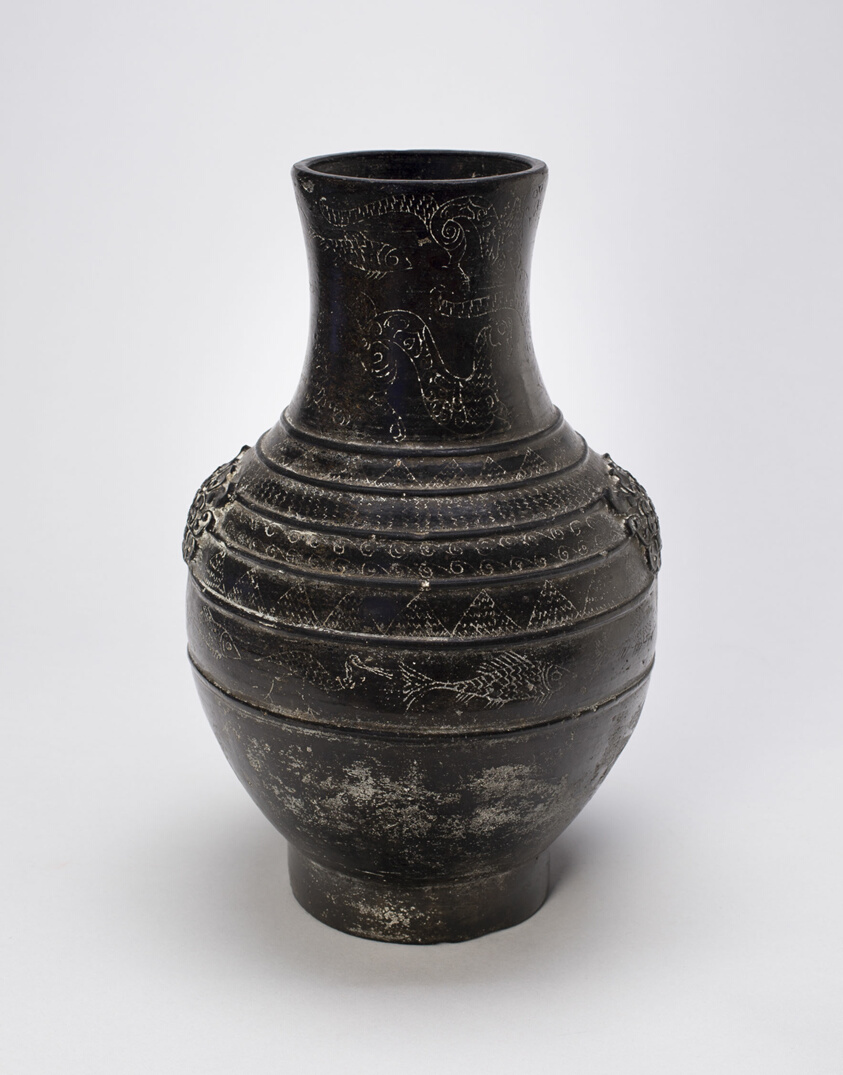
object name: Vessel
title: Container in the Form of a Bronze Jar (Hu)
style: Chinese (culture or style)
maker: China; probably Hebei province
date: Warring States period, 475–221 BCE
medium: Earthenware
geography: China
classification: vase; earthenware; vessel; asian art; ceramics